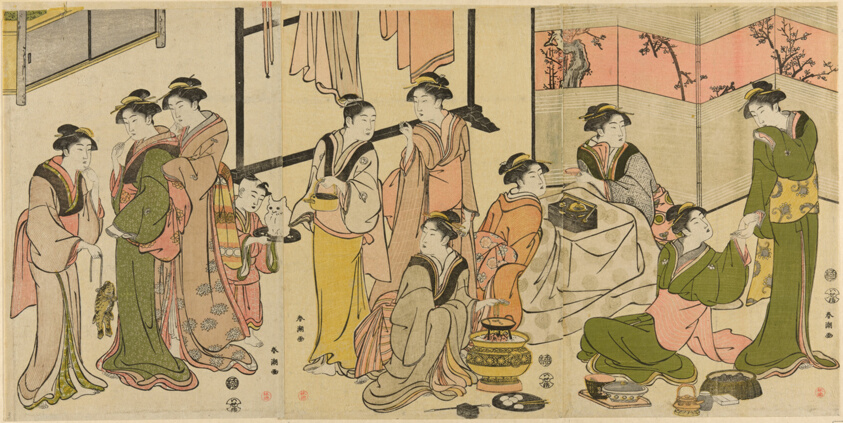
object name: Print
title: Around the Kotatsu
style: Japanese (culture or style)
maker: Katsukawa Shuncho; Japanese, active c. 1780-1801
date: c. 1789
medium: Color woodblock print; oban triptych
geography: Japan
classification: woodblock print; print; asian art